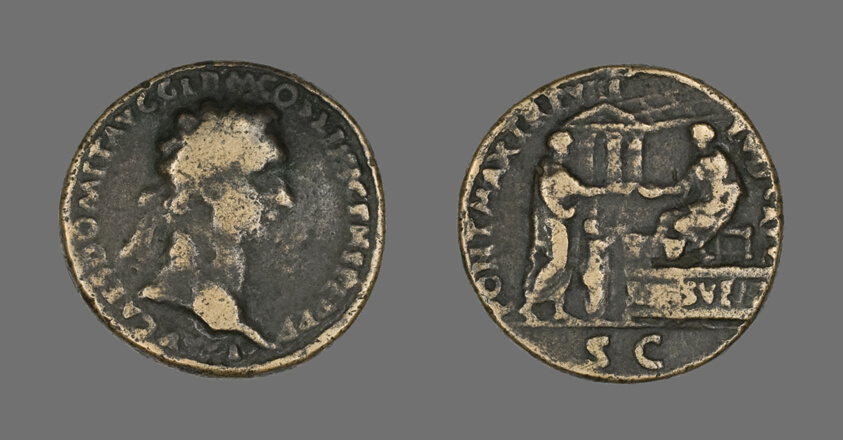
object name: Coin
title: Coin Portraying Emperor Domitian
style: imperial (roman), ancient, roman (ancient, style or period)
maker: Roman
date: 88 (?)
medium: Bronze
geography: Roman Empire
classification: coin; ancient art